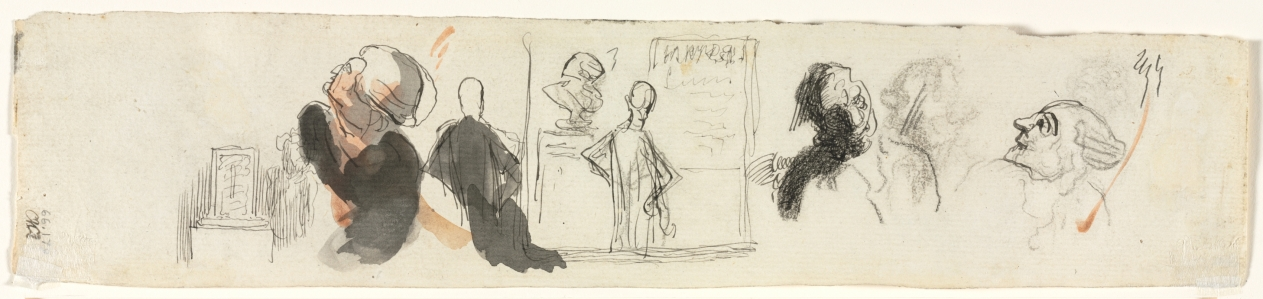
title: Sketches of Various Figures (verso)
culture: France, 19th century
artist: Honoré Daumier (French, 1808–1879)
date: 1850–75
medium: pen and black ink, black chalk, black crayon and brush and black and brown wash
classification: Drawing